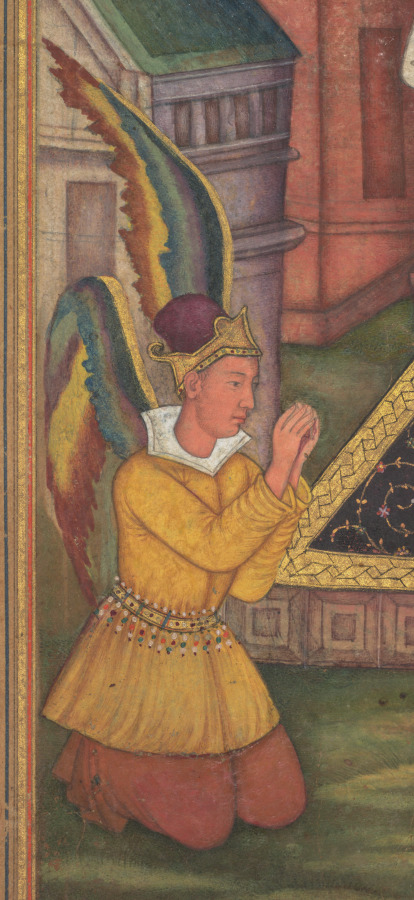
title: The Annunciation (folio 15 recto), from a Mirror of Holiness (Mir’at al-quds) of Father Jerome Xavier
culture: Mughal India, Allahabad, made for Prince Salim (1569–1627)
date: 1602–4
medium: Gum tempera, ink, and gold on paper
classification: Manuscript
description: Mary gazes down at the angel Gabriel as he kneels reverently, like a humble messenger, delivering the news that Mary will give birth to the son of God. His multicolored wings are forced within the boundary line of the painting field, visually implying a sense of subordination. Unlike many of the paintings in the Mirror of Holiness, the Annunciation is a familiar subject in European art, but the emphases vary. The Indian version depicts her as a queen, with a crown held above her head and attendants standing by.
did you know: The text states that Mary was only age 13 1/2 when the angel Gabriel came to her.